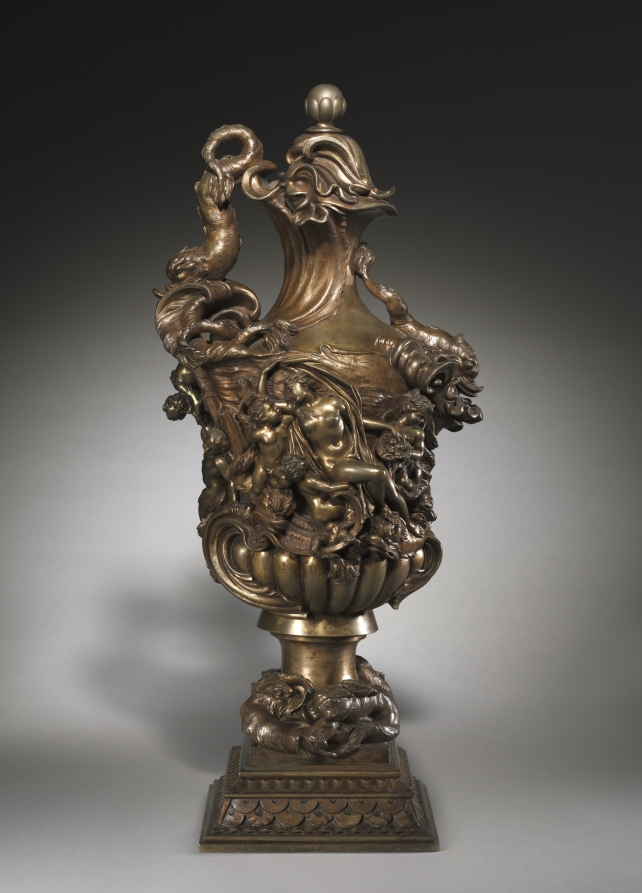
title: Ewer with Triumph of Galatea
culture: Italy, Florence, late 17th-early 18th Century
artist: Massimiliano Soldani (Italian, 1656–1740)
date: c. 1700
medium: bronze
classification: Sculpture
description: Upon discovering the sea nymph Galatea's infidelity, her betrothed, the Cyclops Polyphemus, pulverizes her lover Acis with a rock. In grief, Galatea turns his blood into a river and Acis becomes god of that river, which bears his name. Here Galatea escorts a swarm of sea creatures in celebration of Acis's apotheosis.